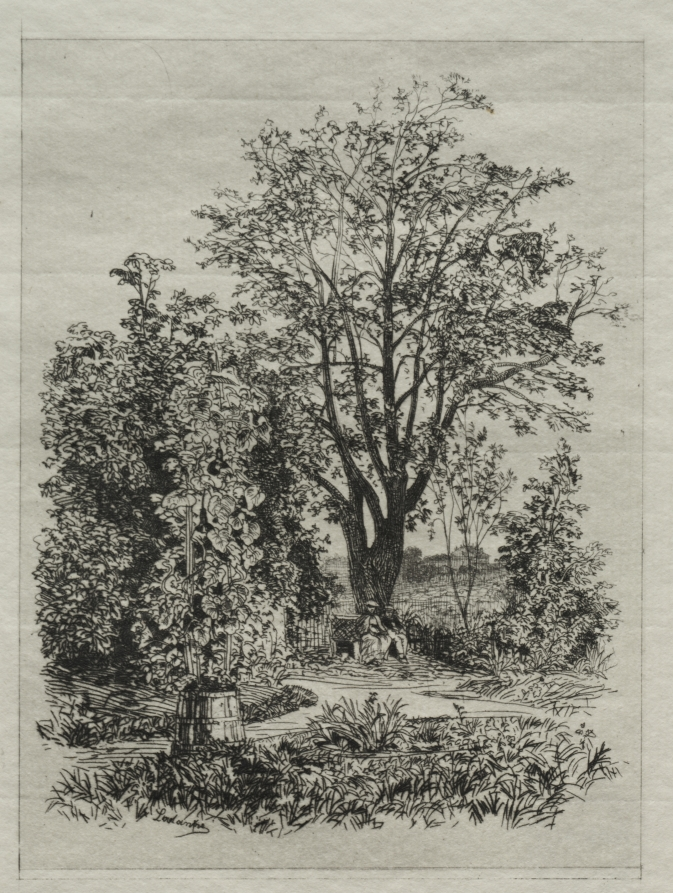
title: In my Bordeaux Garden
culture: France, 19th century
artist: Maxime Lalanne (French, 1827–1886)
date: 1872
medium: etching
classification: Print